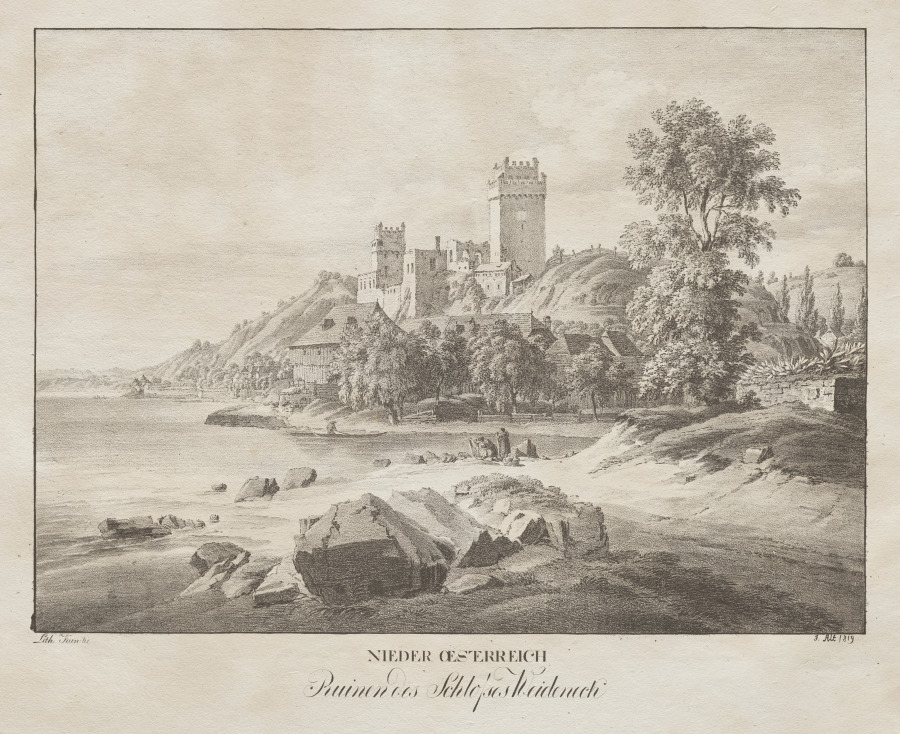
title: Nieder-oesterreich, Ruinen des Schlosses Weidenech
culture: Austria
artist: Jakob Alt (Austrian, 1789–1872)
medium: lithograph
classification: Print